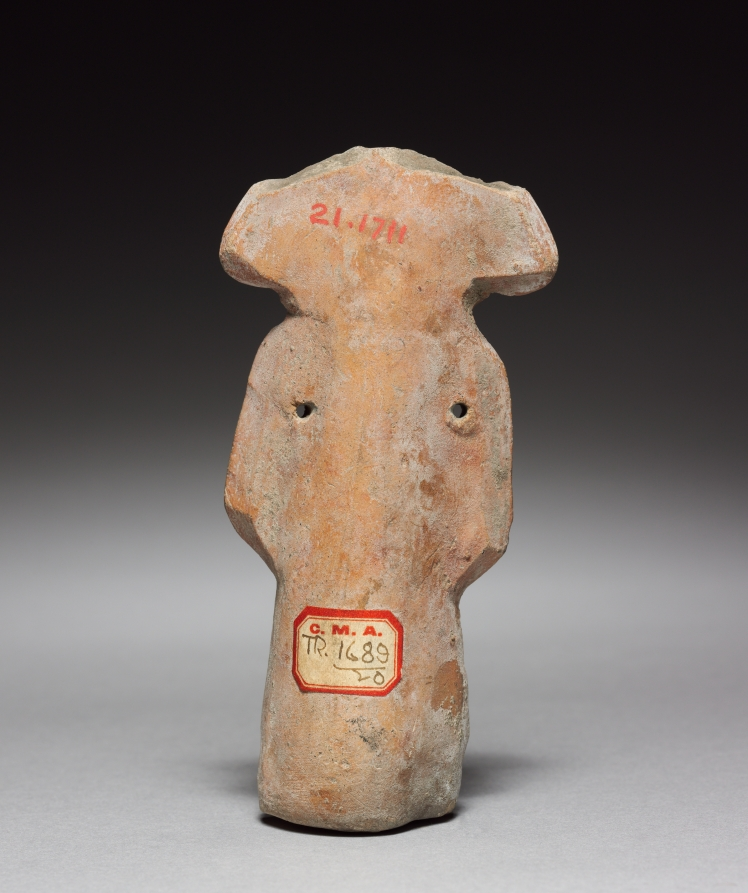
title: Mother-and-Child Figurine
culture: Mexico, Aztec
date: 1325–1521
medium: Ceramic, pigment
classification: Ceramic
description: The hair of this hollow, mold-made, female figurine was originally arranged in two projections atop the head. She carries an identical, small figure interpreted as a child; the figurine may be a metaphor for generational continuity.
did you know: This mother-and-child figurine may be a metaphor for generational continuity.